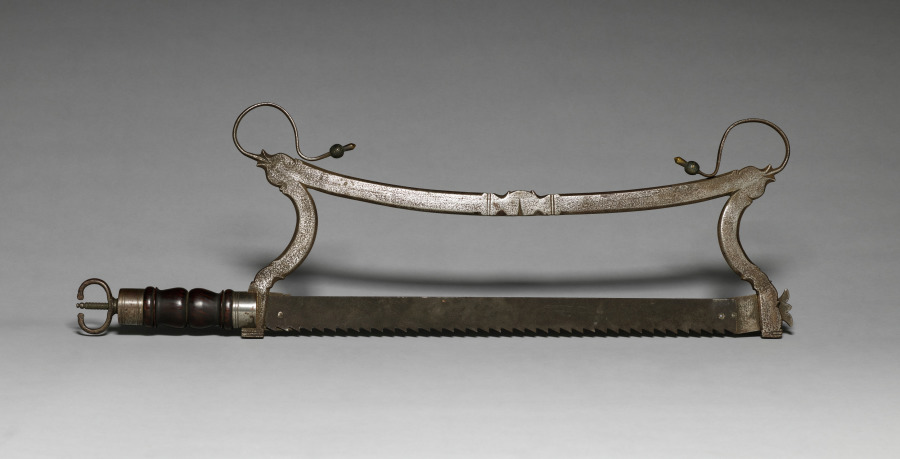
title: Hand Saw with Blade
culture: Europe, 17th century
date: 1600s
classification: Tool